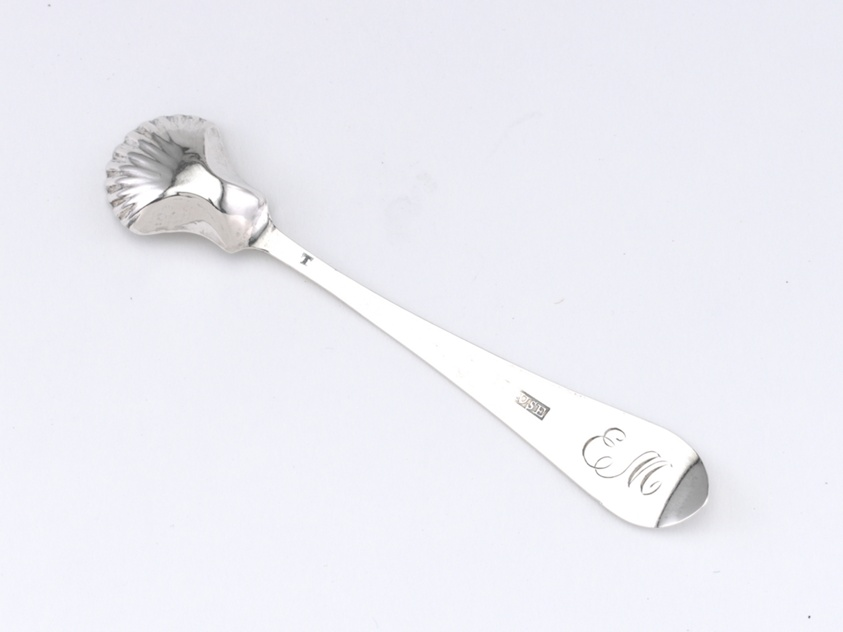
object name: Metalwork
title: Pair of Salt Spoons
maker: John Samuel Krause (American, 1782–1815); Bethlehem, Pennsylvania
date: 1805–15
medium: Silver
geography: Bethlehem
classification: spoon; silver; utensil; american decorative arts; american arts; decorative arts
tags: spoon